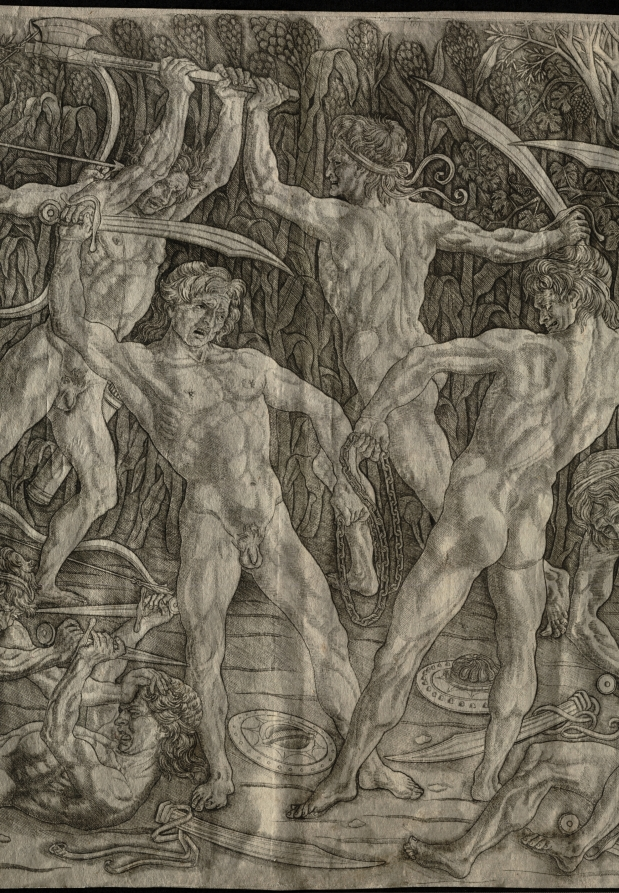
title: Battle of the Nudes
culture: Italy, 15th century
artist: Antonio del Pollaiuolo (Italian, 1431/32–1498)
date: 1470s–80s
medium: engraving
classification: Print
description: This engraving is one of the earliest Renaissance prints to portray the nude male body in action. Antonio del Pollaiuolo’s grimacing warriors appear like clones in different poses. The print may have functioned as a model for workshop apprentices studying human anatomy while learning to draw; however, the artist’s Latin signature suggests it also had an audience educated in literature. Art historians remain uncertain whether Pollaiuolo intended to depict a particular story or historical event. It is possible he created a deliberately ambiguous allegory that would appeal to patrons interested in interpreting symbols. For example, the continuous chain shared by the two central men could refer to an ancient idea that the body is the chain of the soul, only to be released in death.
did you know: Considered a groundbreaking work in the history of the Italian Renaissance, the CMA holds the only known impression of the print's first state.